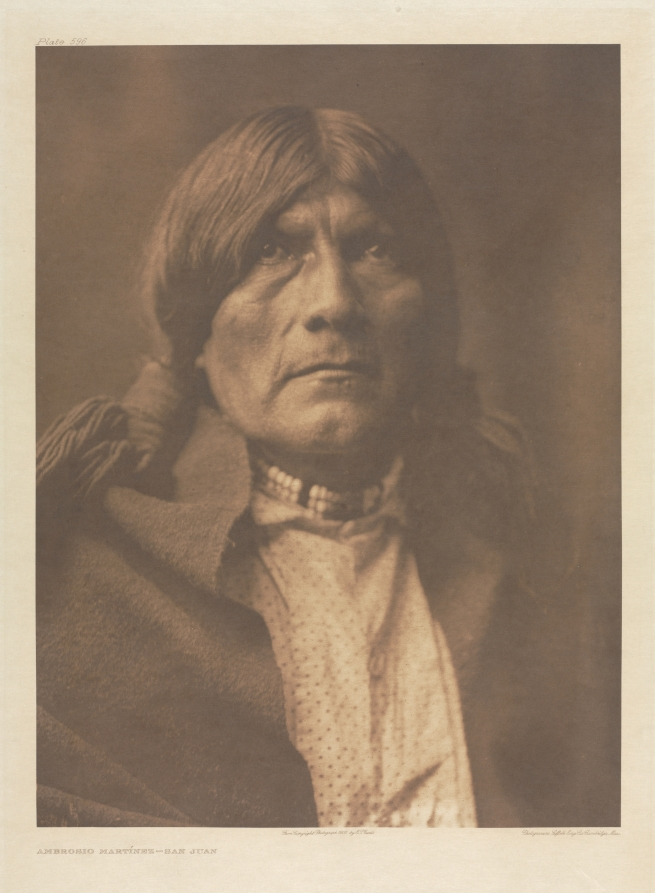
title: Portfolio XVII, Plate 596: Ambrosio Martínez - San Juan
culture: America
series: The North American Indian: being a series of Portfolios picturing and describing the Indians of the United States, the Dominion of Canada, and Alaska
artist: Edward S. Curtis (American, 1868–1952)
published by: The University Press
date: 1905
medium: photogravure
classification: Portfolio